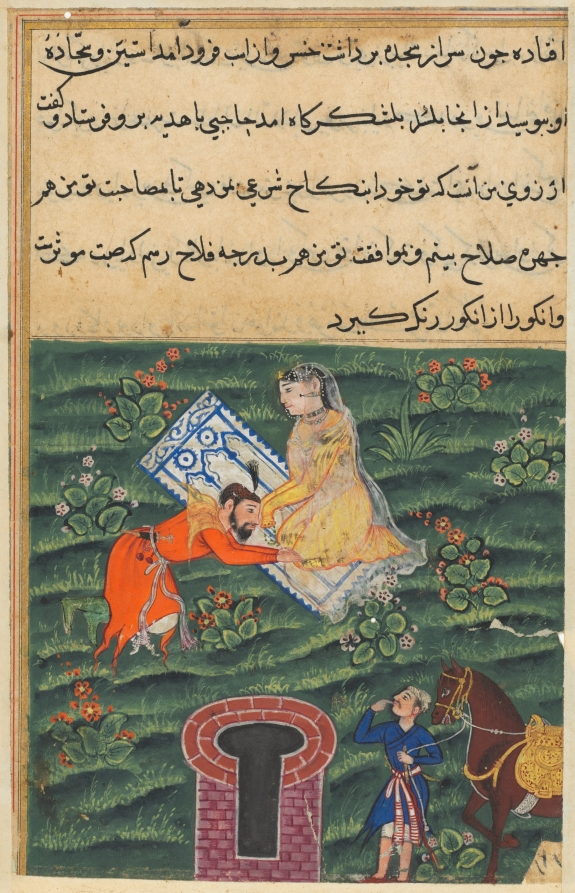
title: Khusrau, the King of Kings, pays homage to the pious daughter of Khassa, from a Tuti-nama (Tales of a Parrot): Fifty-first Night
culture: Mughal India, court of Akbar (reigned 1556–1605)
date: c. 1560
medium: gum tempera, ink, and gold on paper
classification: Painting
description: After being abandoned in the desert by her cruel husband, Khassa’s daughter is discovered by Khusrau, who is instantly captivated by her religious devotion. He proposes marriage and aptly punishes those who were cruel to her. The brick well that sustained her for many days in the desert is depicted in the foreground.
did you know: The woman kneels on a rug and holds prayer beads, signaling her Islamic faith.